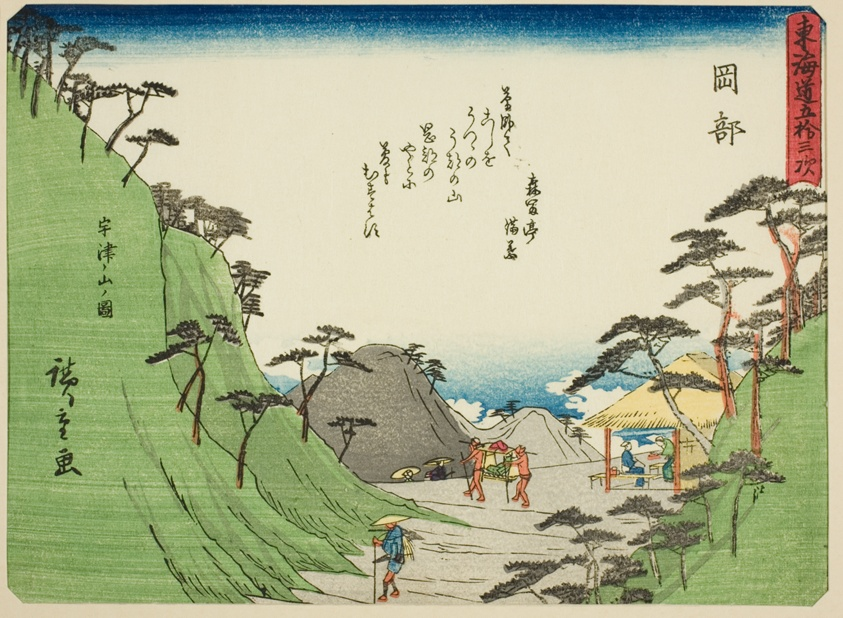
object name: Print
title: Okabe: View of Mount Utsu (Okabe, Utsunoyama no zu), from the series "Fifty-three Stations of the Tokaido (Tokaido gojusan tsugi)," also known as the Tokaido with Poem (Kyoka iri Tokaido)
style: Japanese (culture or style)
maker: Utagawa Hiroshige 歌川 広重; Japanese, 1797-1858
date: c. 1837/42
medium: Color woodblock print; chuban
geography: Japan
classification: woodblock print; print; asian art